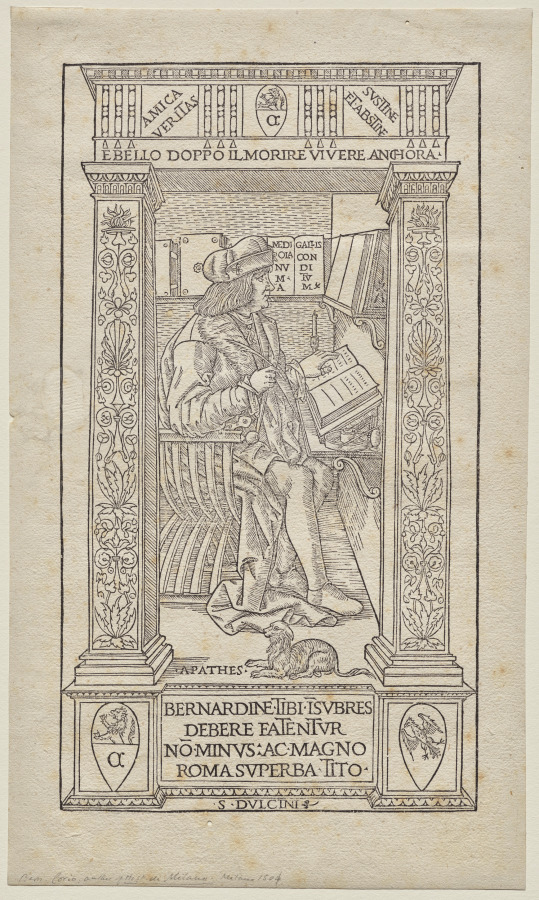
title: Bernardino Corio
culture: Italy, Milan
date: 1503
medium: woodcut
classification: Print